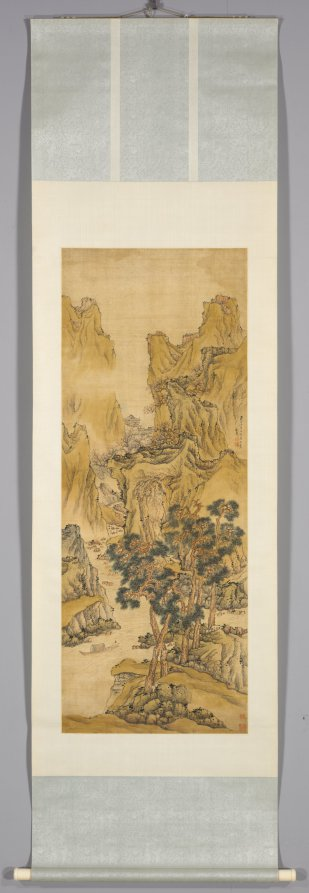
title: The Peach Blossom Spring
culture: China, Ming dynasty (1368–1644)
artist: Liu Du (Chinese, active c. 1628-after 1653)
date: 1650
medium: hanging scroll; ink and light color on satin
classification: Painting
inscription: Artist's inscription, signature, and 2 seals at middle right edge: In the tenth month of the gengyin year [1650], painted in imitation of Zhao Chengzhi [Chao Mengfu]. Liu Du [seals] Liu Du zhi yin; Shu xian.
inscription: 2 additional seals of Low Chuck Tiew 劉作籌 (1911–1993).